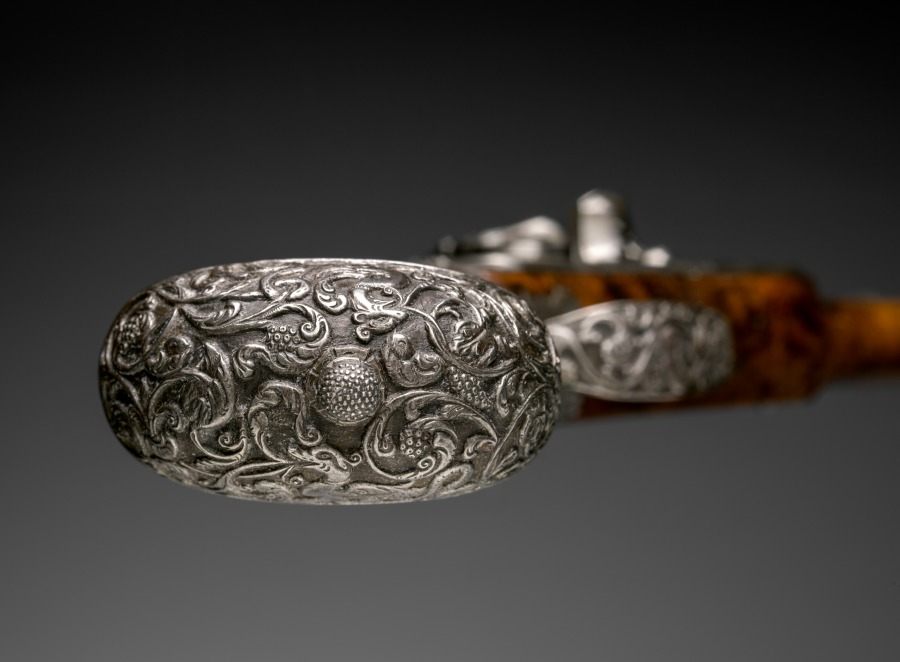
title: Flintlock Pistol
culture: Italy, Brescia, late 17th century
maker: Gio Borgognone (Italian)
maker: Lazarino Cominazzo (Italian)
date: c. 1690–1700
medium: steel, chiseled steel with walnut stock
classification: Arms and Armor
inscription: barrel signed: Lazarino Cominazzo; lockplates signed: Gio Borgognone in Bresia